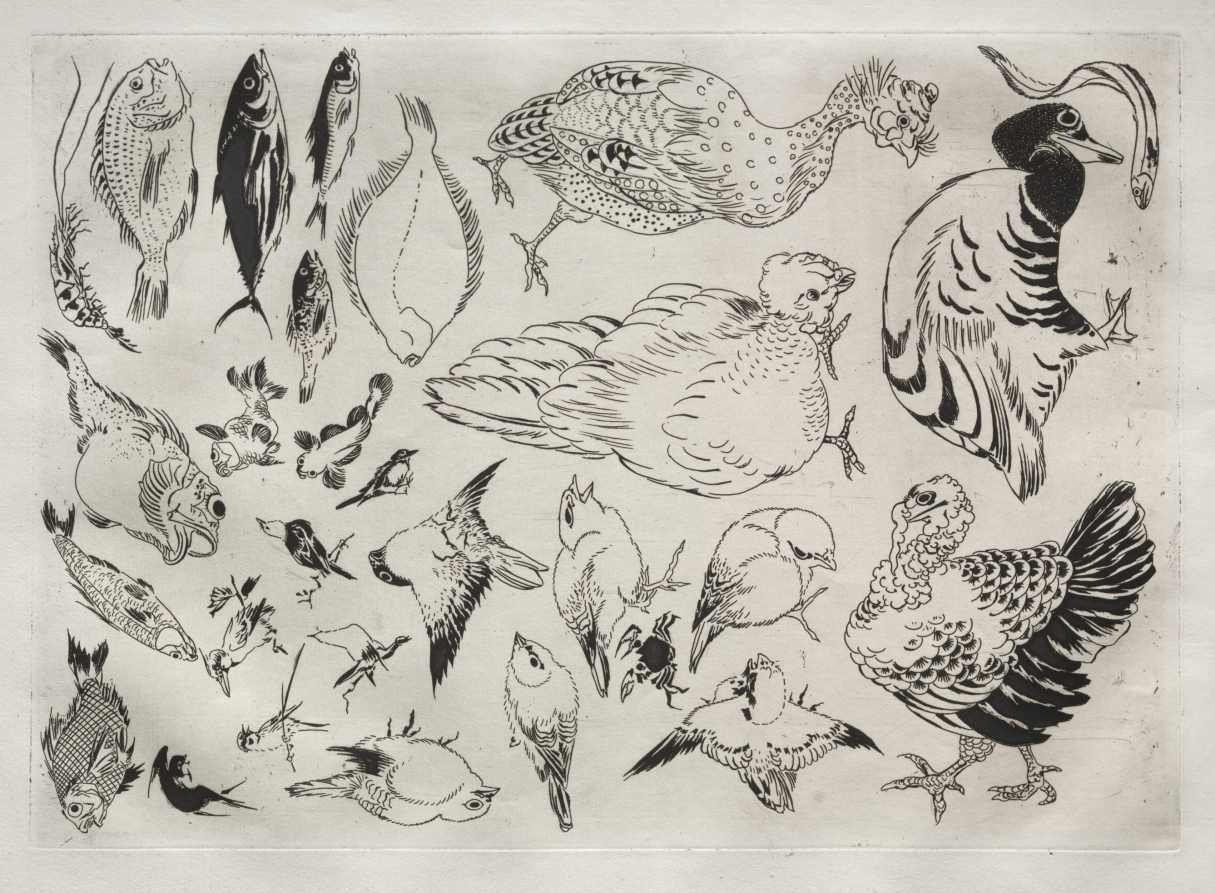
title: Dinner Service (Rousseau service): Ducks, fish, etc. (no. 12)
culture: France, 19th century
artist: Félix Bracquemond (French, 1833–1914)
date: 1866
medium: etching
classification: Print